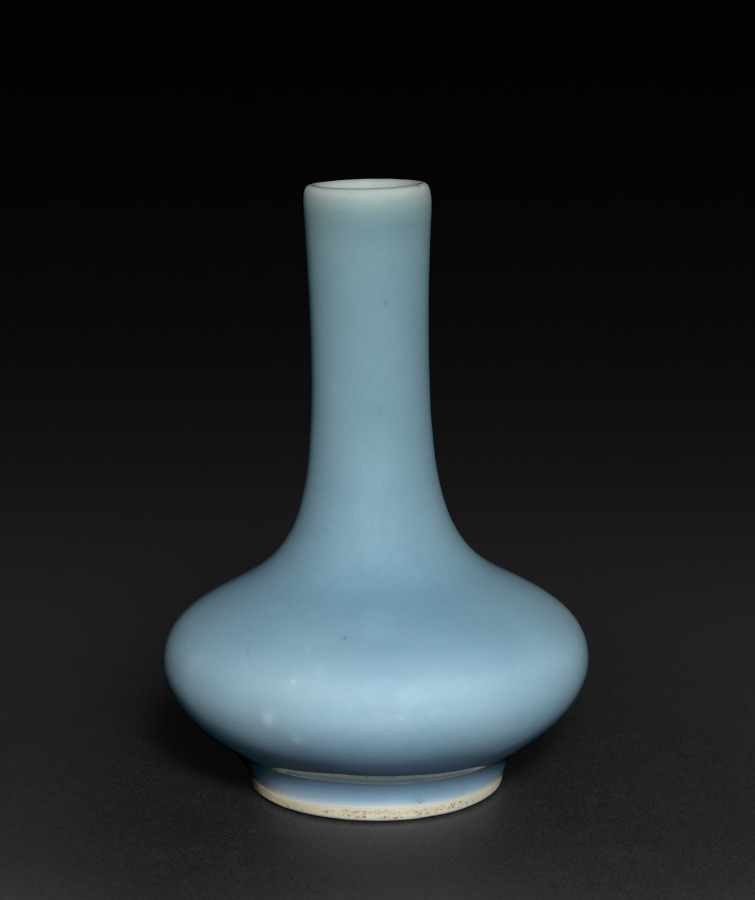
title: Bottle-Shaped Vase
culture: China, Qing dynasty (1644-1911), Kangxi reign (1661-1722)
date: 1661–1722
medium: porcelain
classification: Ceramic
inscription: 大清康熙年製